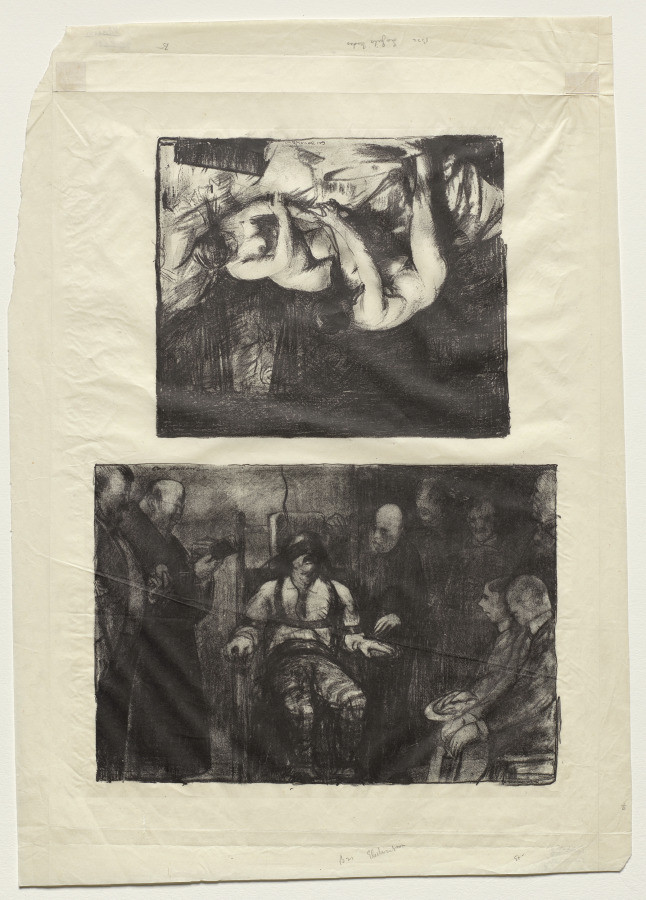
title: Electrocution, first state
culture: America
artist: George Bellows (American, 1882–1925)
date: 1917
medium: lithograph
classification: Print